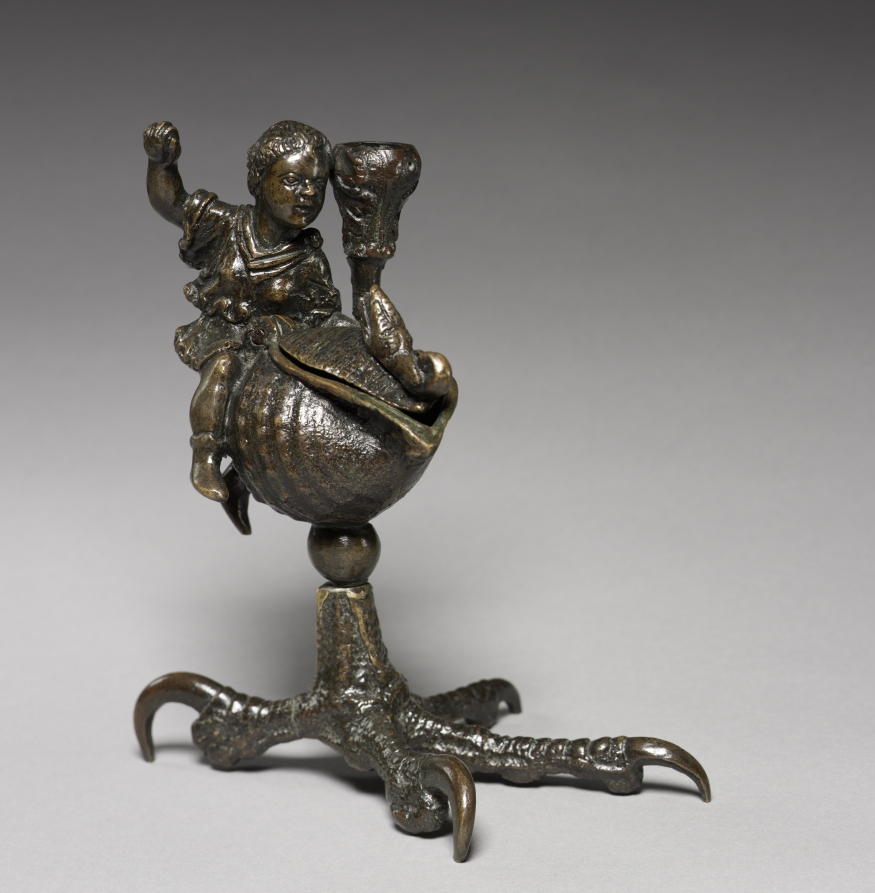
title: Inkwell and Candlestick with the Infant Hercules Killing the Serpents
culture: Italy, Ravenna, 16th century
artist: workshop of Severo da Ravenna (Italian, c.1496–c.1543)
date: c. 1510–20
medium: bronze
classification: Sculpture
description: In the early 1500s, Padua, a center of strong humanist traditions, encouraged the revival of classicism, and artists took their cues from descriptions in the works of classical authors. Classical small-scale bronzes grew in demand, and in response, the city's bourgeoning foundries produced a varied and extensive supply of small statues. Like many early Paduan bronzes, this work's utilitarian function—used to hold ink and to supply light—is complimented by its ornamental value. The base consists of an eagle claw, cast from life, supporting an equally realistic nautilus shell. Though medieval artists had occasionally used seashells to hold paints, the shell inkwell, whose small size makes it rather impractical to use, was a motif particular to Padua. Perched upon the shell is most likely Hercules, the son of Zeus. Perhaps aided by a staff (now missing) he is poised to strike a serpent, which according to myth was sent by Hera, the jealous wife of Zeus, to kill him. The dramatic opposition of hero and monster enhances the connection to the classical past, further meeting the desires of the educated patrons of Padua.